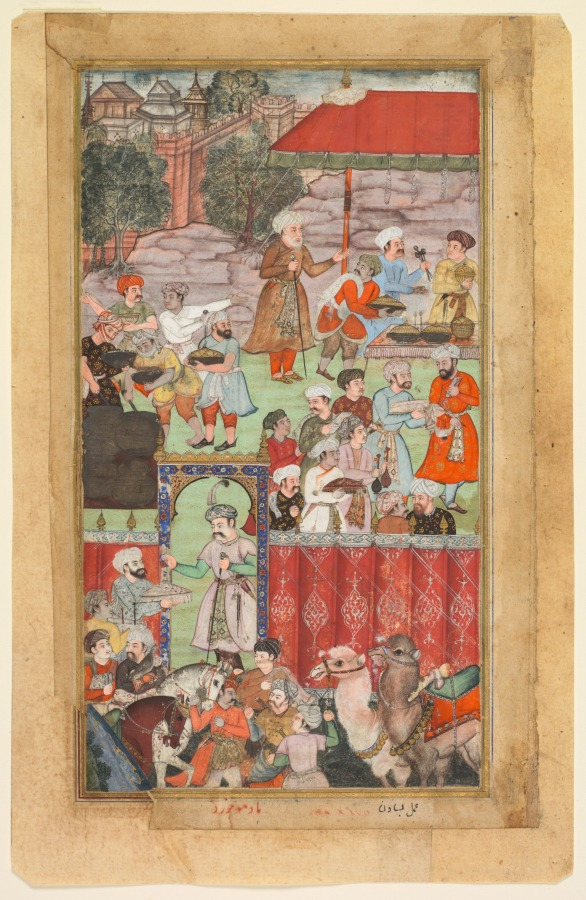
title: A feast for Babur hosted by his half-brother Jahangir Mirza in Ghazni in May 1505, from a Babur-nama (Memoirs of Babur)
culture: India, Mughal, 16th century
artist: Basavana (Indian, active c. 1560–1600)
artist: and Madhav Khurd (Indian, active late 1500s)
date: c. 1589; outer margins added c. mid-1900s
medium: Gum tempera and gold on paper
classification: Painting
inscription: verso: Persian text, in nasta‘liq script: . . . presented many gifts. In that year most of the rivers had become very swollen, to the extent that the Dih-i Ya‘qub River could not be forded. I brought the boat I had made at the lake and floated it in the waters of Dih-i Ya‘qub opposite Kamri and all the people crossed by boat. For this reason we went through the Sajavand pass and straight through crossing the river at Kamri by boat. We arrived at Kabul in the month of Dh’ul-Hijja [May 1505]. A few days earlier, Sayyid Yusuf Beyg had died of colic. At Kush Gunbad, Nasir Mirza had requested leave and remained behind to get provisions for his retinue from his own domain, saying he would follow in two or three days. Once he had left us he sent his entire army to the Nur valley on account of a minor act of disobedience by the people of the Nur valley. [Given] its rice fields and the location of its citadel on the peak of the mountain as . . .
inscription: recto: Persian inscription in bottom margin, in nasta‘liq script: the work of Basavana / [ . . . ] / Madhav Khurd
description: Twenty-one years before his conquest of Delhi, Babur took control of territories in Afghanistan, including the cities of Kabul and Ghazni. His half-brother, who controlled the region around Ghazni, ordered that a party be thrown in honor of Babur’s arrival from the north. Drinking parties and feasts in lavish movable tent settings, where gifts were exchanged, alliances forged, and relationships cemented, were as important to the building of the empire as the battles.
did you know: A manager directs servers to bring spoons and lay out the buffet table.